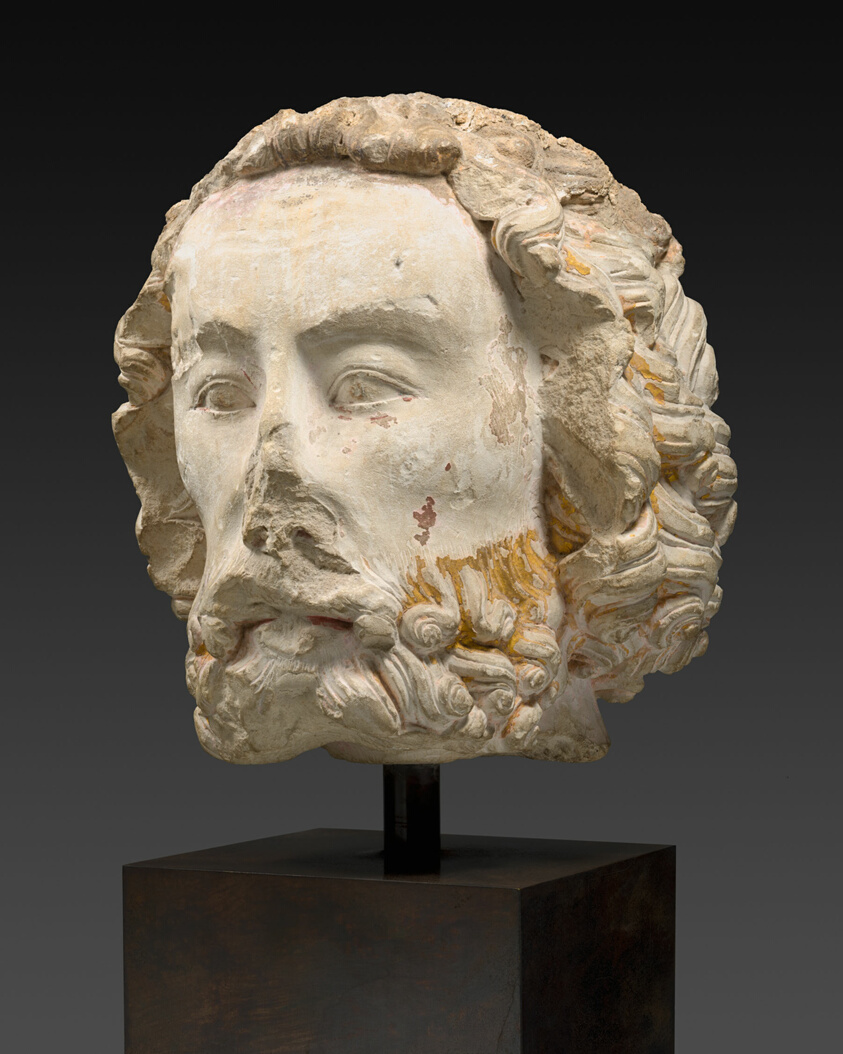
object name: Sculpture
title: Head of a Bearded Man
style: 14th century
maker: French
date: 1300/25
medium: Limestone, traces of polychromy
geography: France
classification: bust/head; sculpture; french; limestone; sculpture/stone; stone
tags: man, Fragment, architectural fragments, architectural fragment, stone, bearded man, head